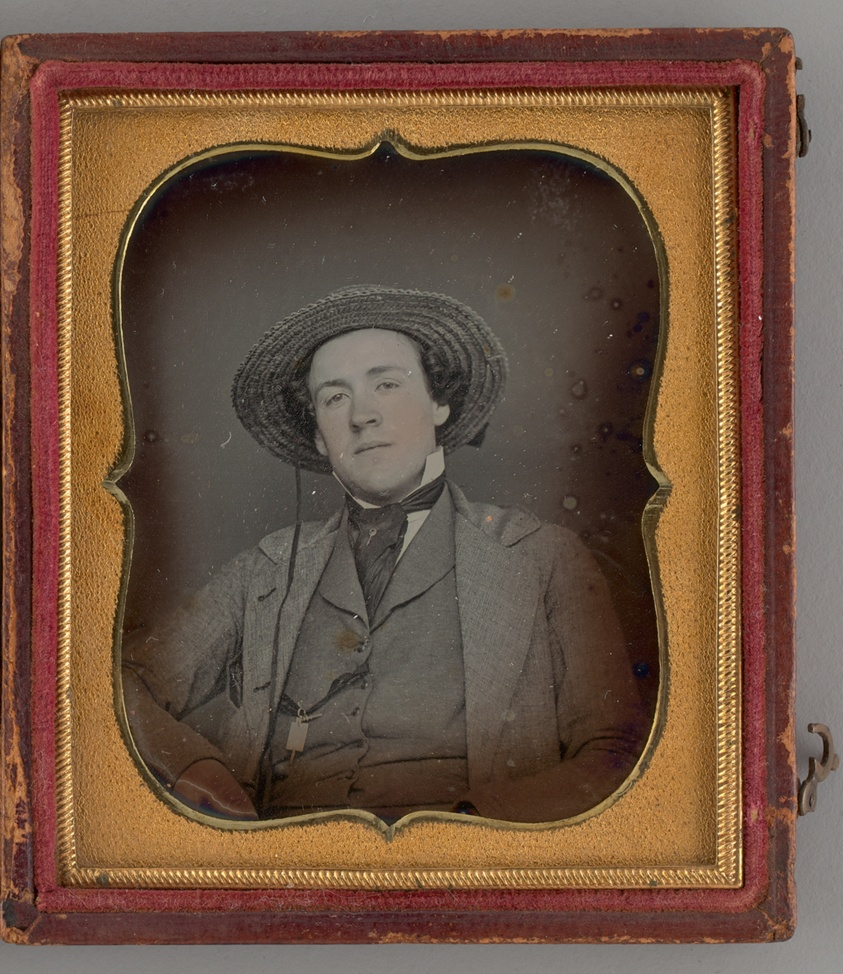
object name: Photograph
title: Untitled (Portrait of a Man with a Straw Hat)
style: 19th century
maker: Boston School (American, 19th century)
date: 1852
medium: Daguerreotype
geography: United States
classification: portrait; photograph; photographic process; photography; portrait; daguerreotype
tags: lundberg collection, portraits, portraits: male subject, hats, portrait